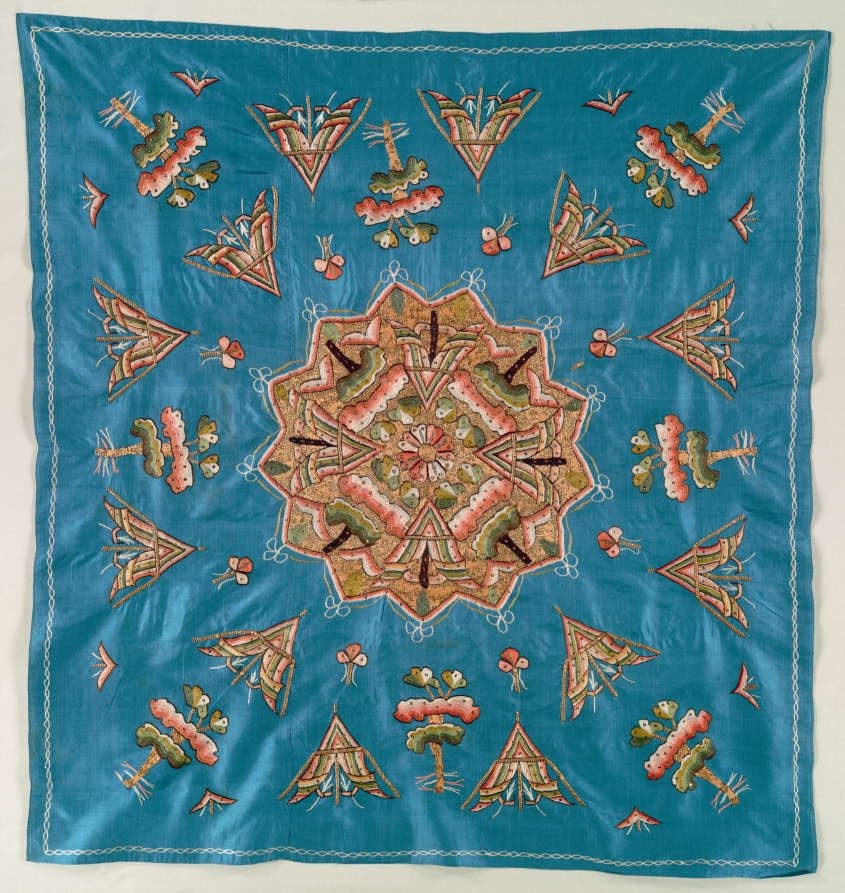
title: Embroidered Table Cover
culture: Turkey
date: 1700s–1800s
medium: Silk and metallic threads on silk tabby ground; embroidery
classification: Embroidery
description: This embroidered table cover has a central medallion containing geometric motifs, which resemble closely clustered tents and trees. This is surrounded on all sides by individual tents and trees.